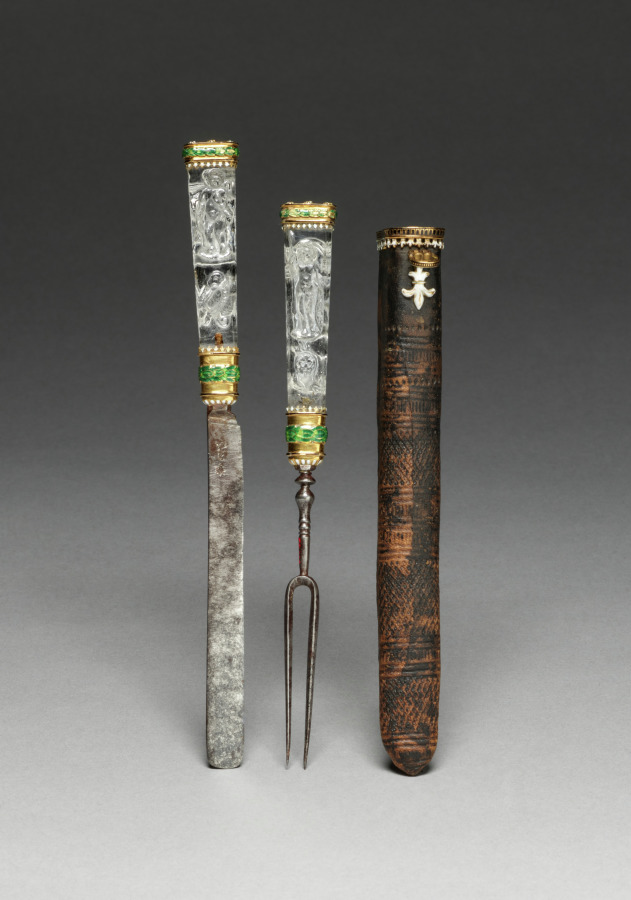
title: Knife and Fork with Sheath Set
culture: Italy, Venice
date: late 1500s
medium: gold, enamel, crystal, steel, leather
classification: Enamel